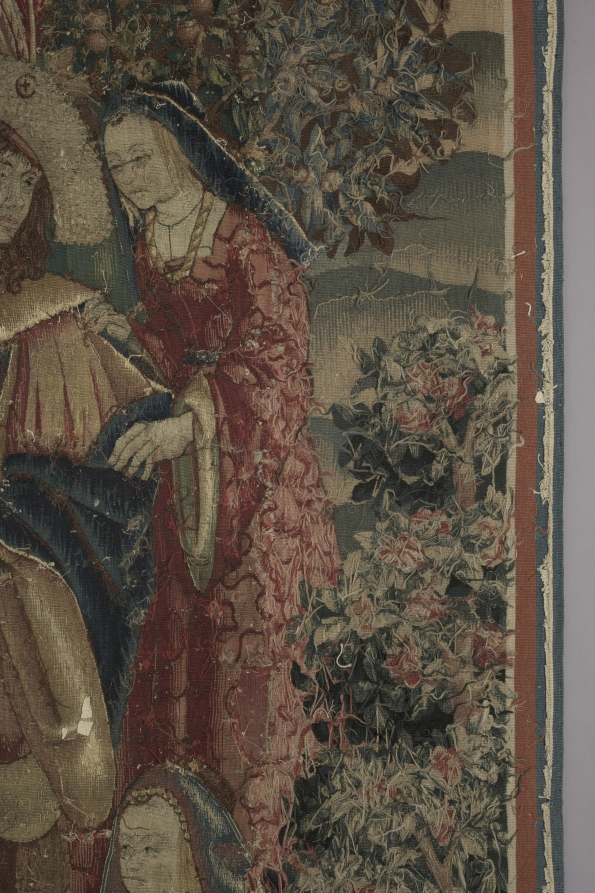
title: Shepherds in a Round Dance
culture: Netherlands, early 16th century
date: around 1500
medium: Wool and silk: tapestry weave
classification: Tapestry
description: Late medieval tapestries often use a limited yet contrasting color palette to portray stylized images. The expressions of these figures, for example, are conveyed more by their postures than by their faces. Four shepherds and shepherdesses join hands and dance to the music of a bagpiper at the far right, while a lord and two ladies on the left look on. A dog and sheep amid blossoming plants and trees contribute to the festive pastoral scene in front of a castle.